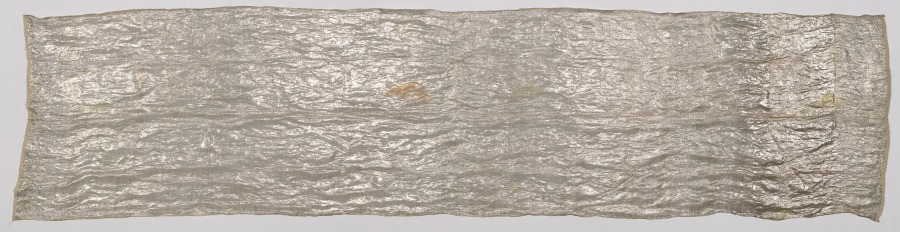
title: Length of Cotton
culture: India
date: early 1900s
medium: cotton, metallic thread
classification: Textile